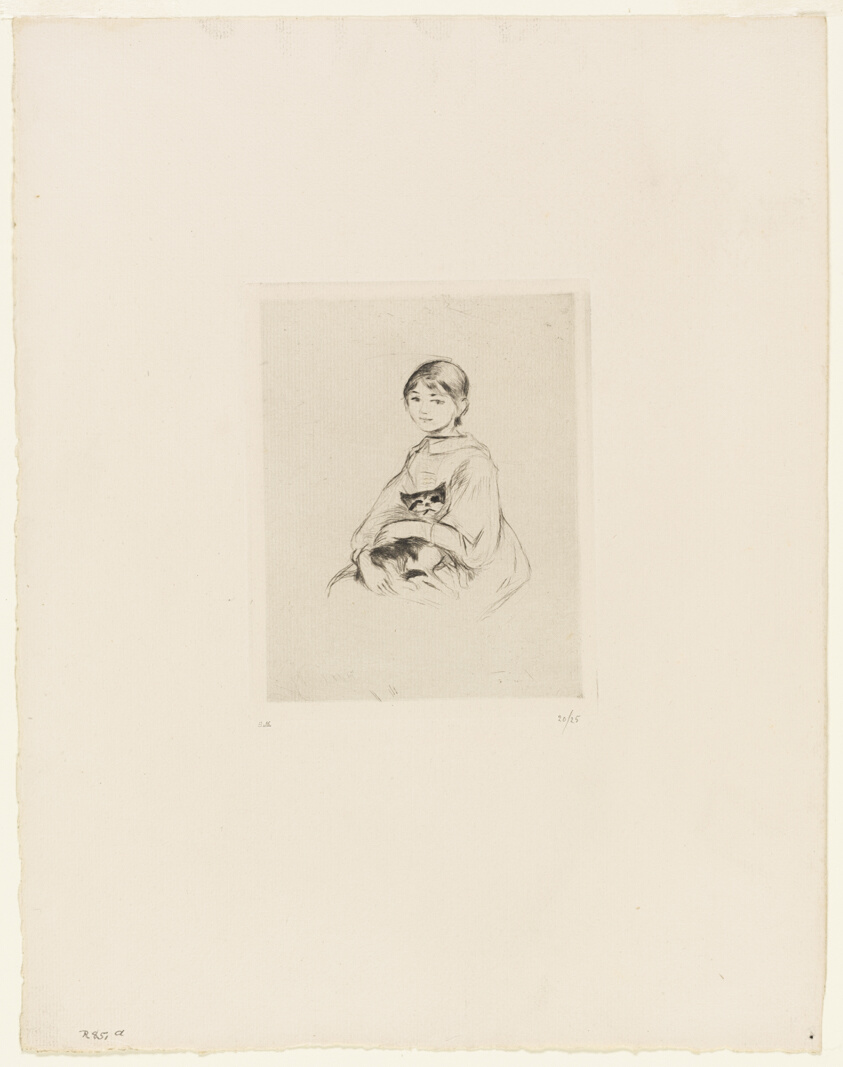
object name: Print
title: Young Girl with a Cat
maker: Berthe Morisot (French, 1841-1895)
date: 1889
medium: Drypoint in black on cream laid paper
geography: France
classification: drypoint; print; prints and drawing